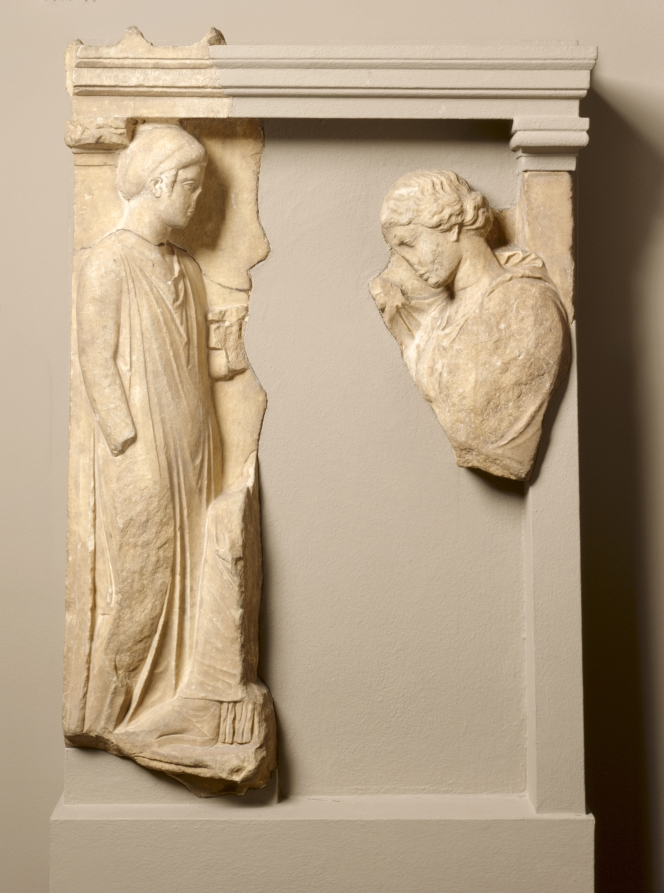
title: Grave Stele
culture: Greece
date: 400–350 BCE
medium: pentelic marble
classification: Sculpture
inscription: ...ΜΕΓΑΛΗΝ ΛΥΠΗΝ ΣΥ ΛΙΠΟΣΑ ΦΑΝ... ...ΔΕ ΣΕΠΩΙΚΤΙΣΕ ΜΟΙΡΑ ΠΟΘΕΙ...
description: Carved in high relief, the original composition of this Attic grave marker can be reconstructed by comparison with more complete examples elsewhere (such as the Stele of Hegeso in Athens [National Archaeological Museum, 3624]). The standing figure at left likely represents a maid or servant, her hair mostly contained within a sakkos (haircloth). Holding a pyxis (small container) in her left hand, she approaches the more fragmentary seated figure at right. This woman, draped and casting her eyes downward, represents the deceased, perhaps Phanostrate, as one scholar has restored the partial name Phan... inscribed in the fragmentary epigram on the preserved portion of the lintel.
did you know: The fragmentary seated woman at right represents the deceased.